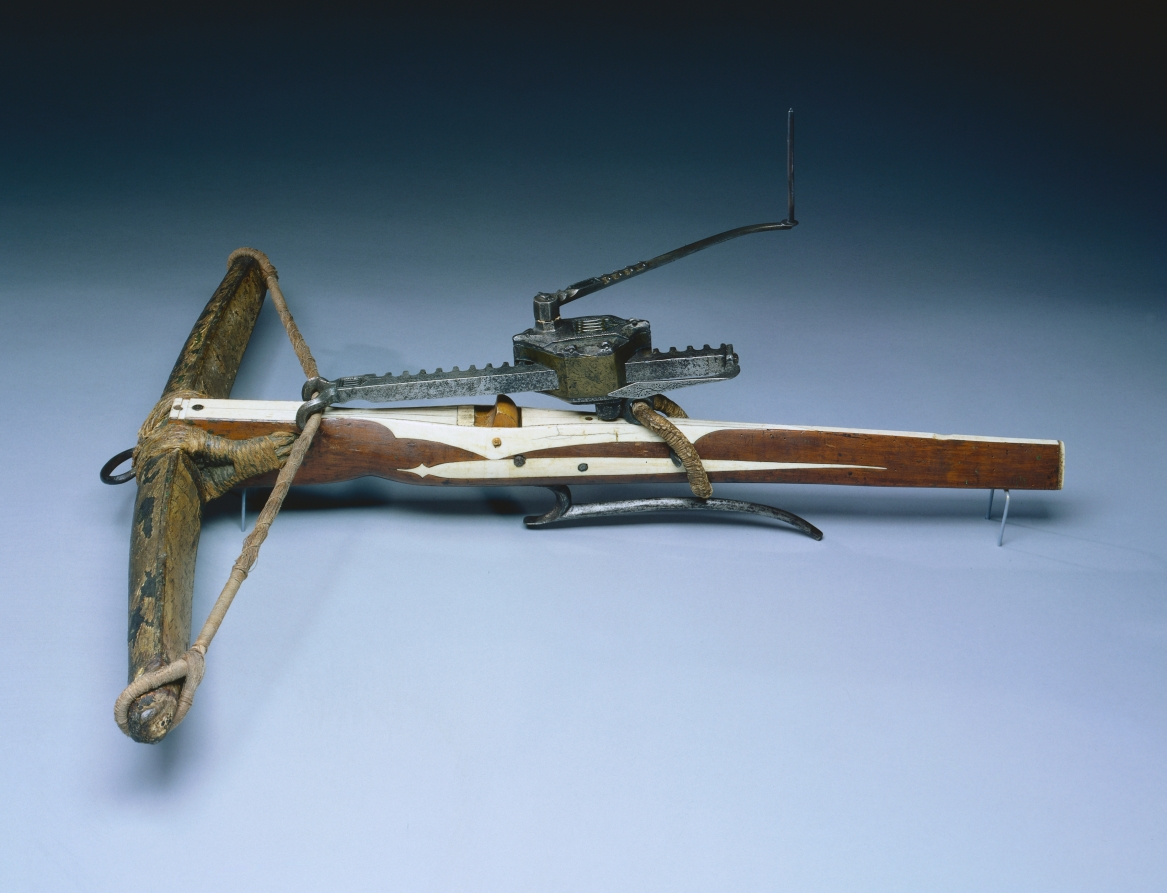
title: Cranequin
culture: France(?)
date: c. 1480–1500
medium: steel and brass; incised decoration; pierced traceried Gothic windows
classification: Arms and Armor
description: Bows made of composite materials were developed during the 1400s. They were immensely powerful and could be spanned only with the aid of a winder called a cranequin like the one seen here.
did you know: The mark, made of inlaid copper, is currently unidentified.